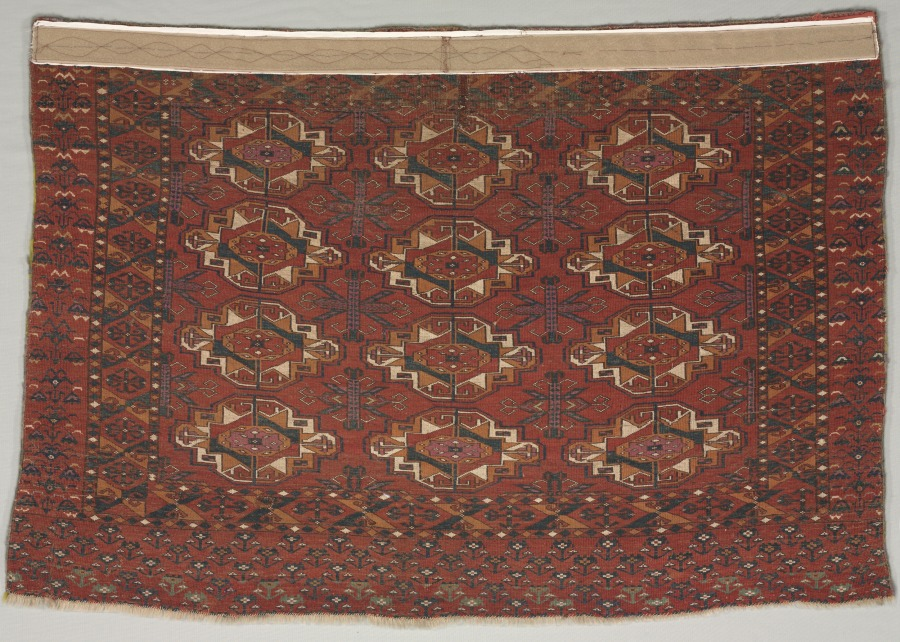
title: Turkmen Bag Face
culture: Turkmenistan, Saryk tribe of the Turkmen people (1850-1899), 19th century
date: 1800s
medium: Wool, silk, cotton; 252 symmetrical rug knots per square inch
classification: Textile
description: The front of this bag, called a bag face, displays the distinctive hallmarks of the Saryk tribe. The main guls, or lobed motifs, are subdivided in quadrants and alternate with angular minor guls in staggered rows. It is the oldest known weaving of the Saryk tribe, with a soft red ground color and white cotton and magenta silk pile highlights. Essential storage containers, bags were suspended from wall trellises inside tents and transported by pack animals during seasonal migrations. Bags were woven in one piece with pile on the upper part for the front face and plain weave on the lower part for the back face, and then folded and sewn along both sides.